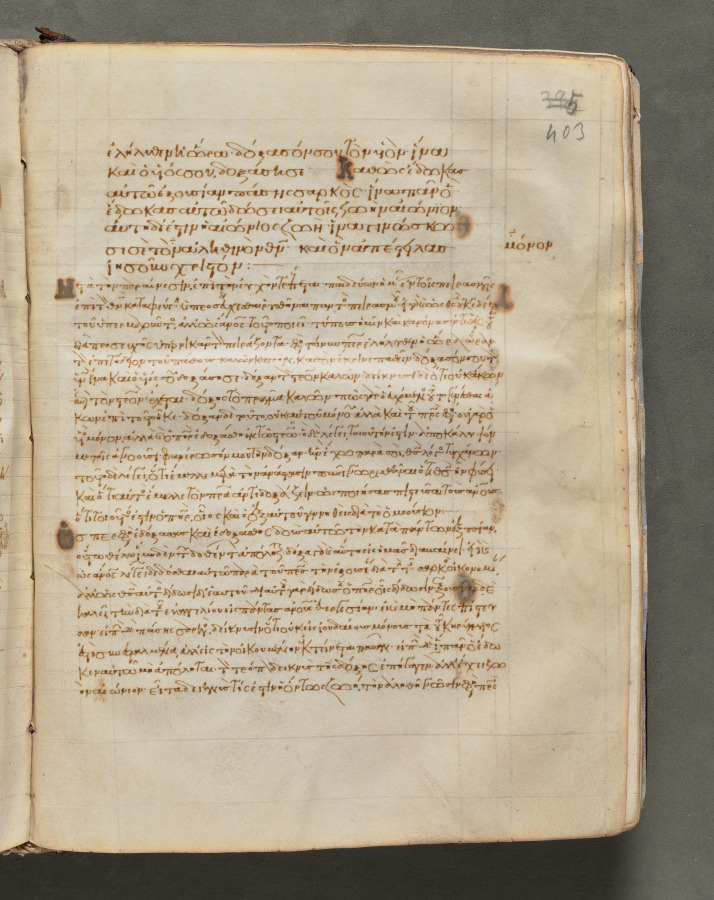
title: Text, folio 403 (recto), from a Gospel Book with Commentaries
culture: Byzantium, Constantinople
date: c. 1000–1100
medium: ink, tempera, and gold on vellum; leather binding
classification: Bound Volume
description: Each of the four gospels in this book opens on a page with brilliantly illuminated borders depicting the author of the text as well as birds—principally peacocks, symbols of the immortality of the soul—and fountains, representing the fountain of life and the salvation of the soul. This volume consists of 428 leaves with texts in Greek. Its level of sophistication suggests that it was probably written and decorated in a monastery in Constantinople.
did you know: Gospel books were carried in procession through Byzantine churches.